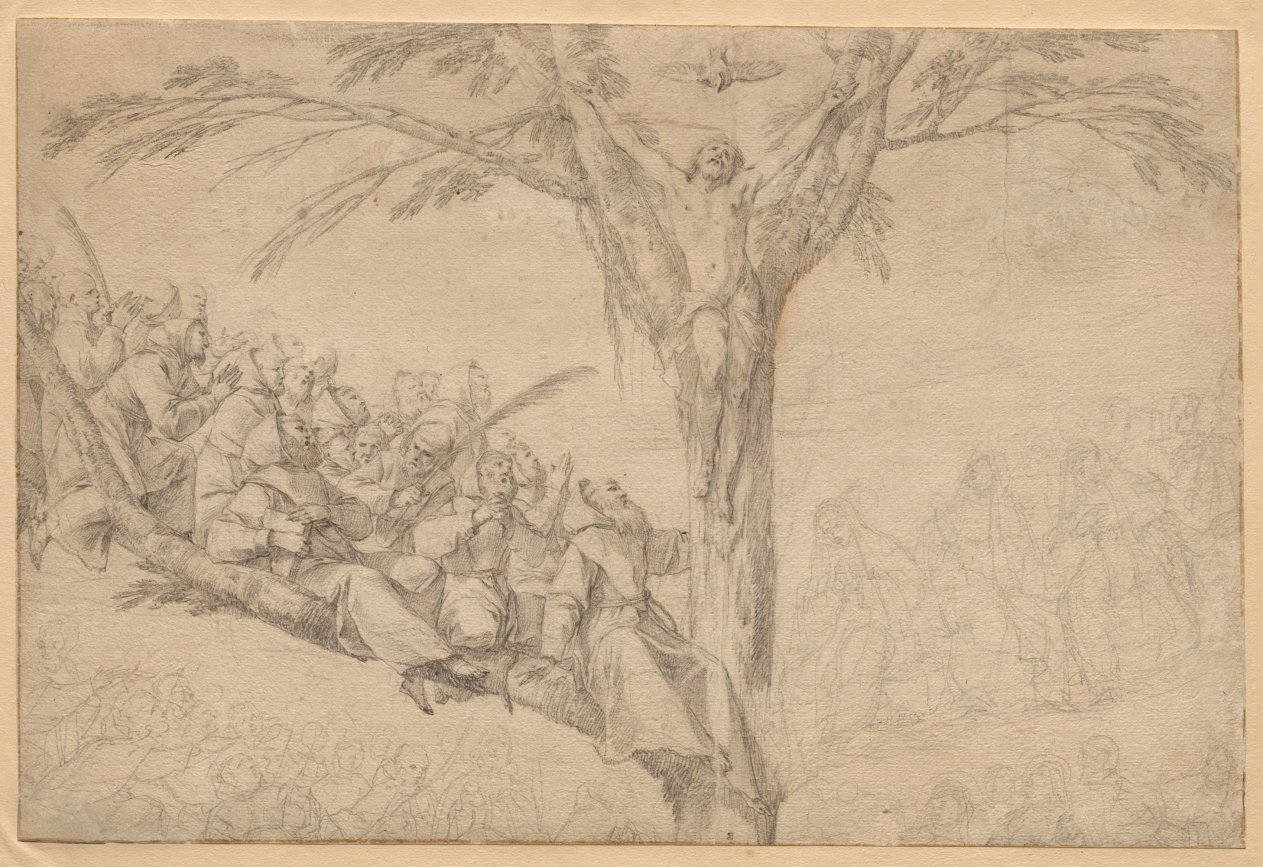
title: The Crucified Christ as the Tree of Life with Monks and Nuns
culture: France, 17th century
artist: Laurent de La Hyre (French, 1606–1656)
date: c. 1639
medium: black chalk, black chalk wash, and graphite with traces of brown wash and red chalk; framing lines in brown ink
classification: Drawing